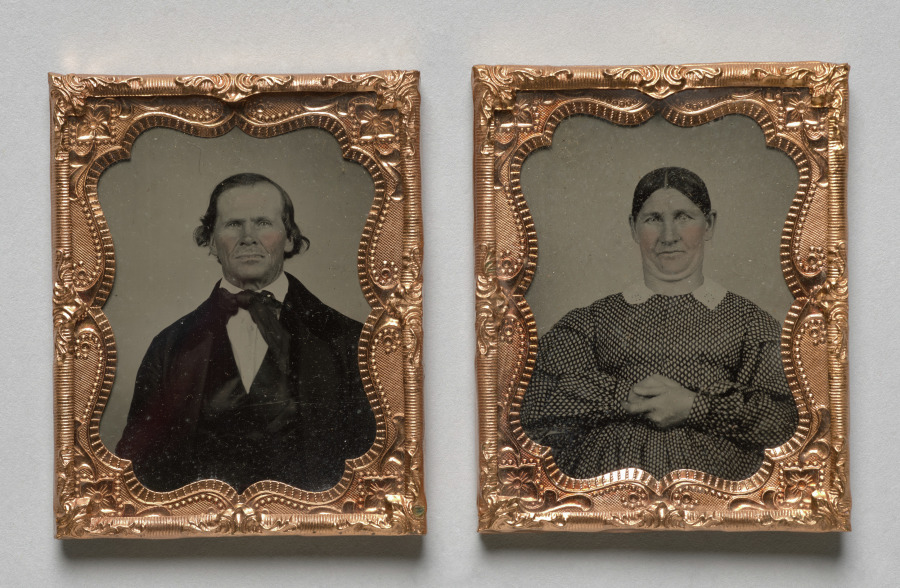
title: Husband and Wife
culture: America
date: c. 1860–65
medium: Two ambrotypes with hand-tinting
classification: Photograph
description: You rarely see a smiling portrait from the mid-19th century. Having your photograph taken was a serious and rare endeavor, plus it was difficult to hold any animated expression long enough for the exposure times required by the early processes. Sitters were instructed to find ways to keep from moving, such as clasping their hands. The woman here has taken the photographers’ cautions to an extreme, resulting in a tense and unflattering portrait.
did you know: In the early decades of photography, many people did not know how to pose for the camera.